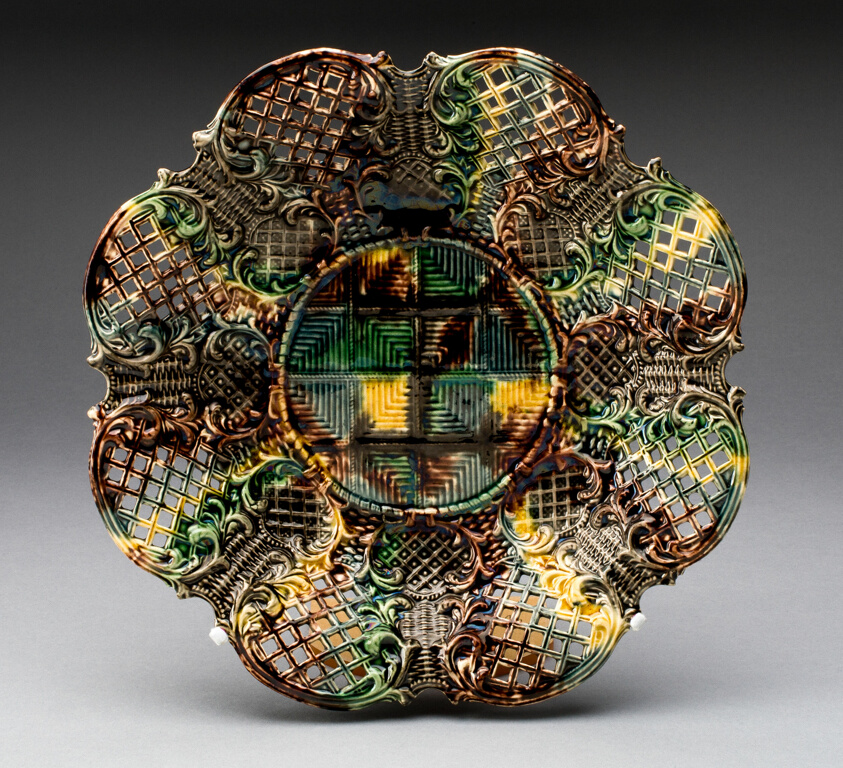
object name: Ceramics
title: Plate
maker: Staffordshire, England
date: 1760/70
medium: Lead-glazed earthenware (creamware)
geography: Staffordshire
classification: plate (general, dish); dish (vessel); ceramics; creamware; earthenware; european decorative arts; lead-glazed earthenware